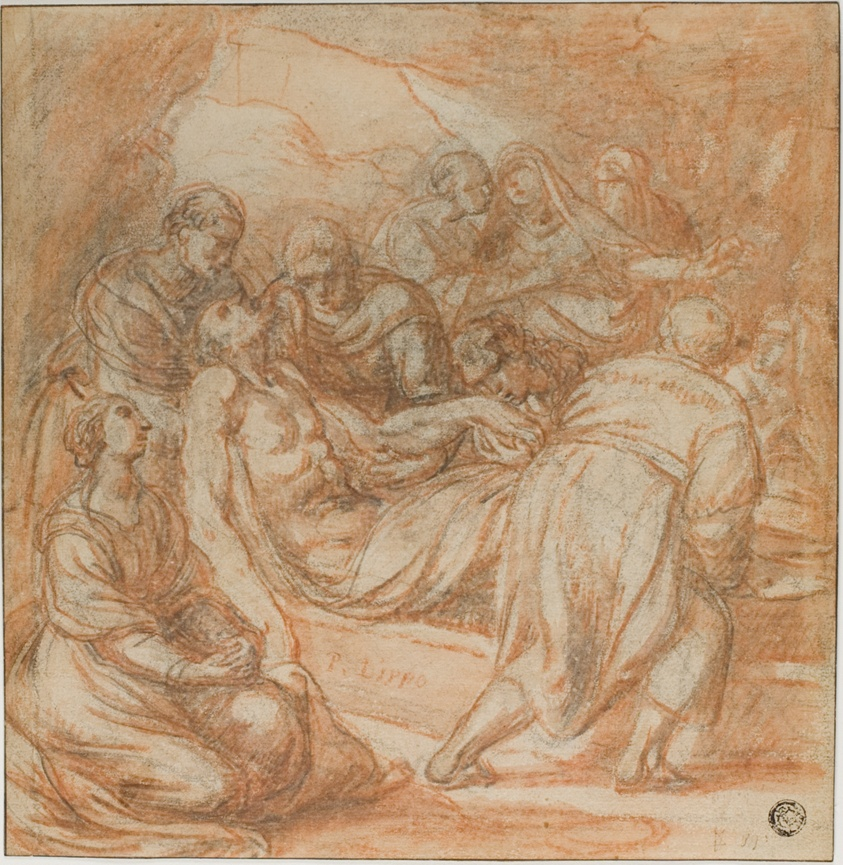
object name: Drawing and Watercolor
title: Entombment of Christ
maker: Unknown Artist; Italian, Lombard, late 16th centlury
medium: Red and black chalk with brush and red chalk wash, on tan laid paper, laid down on cream laid paper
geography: Italy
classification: chalk with wash; drawings (visual works); prints and drawing